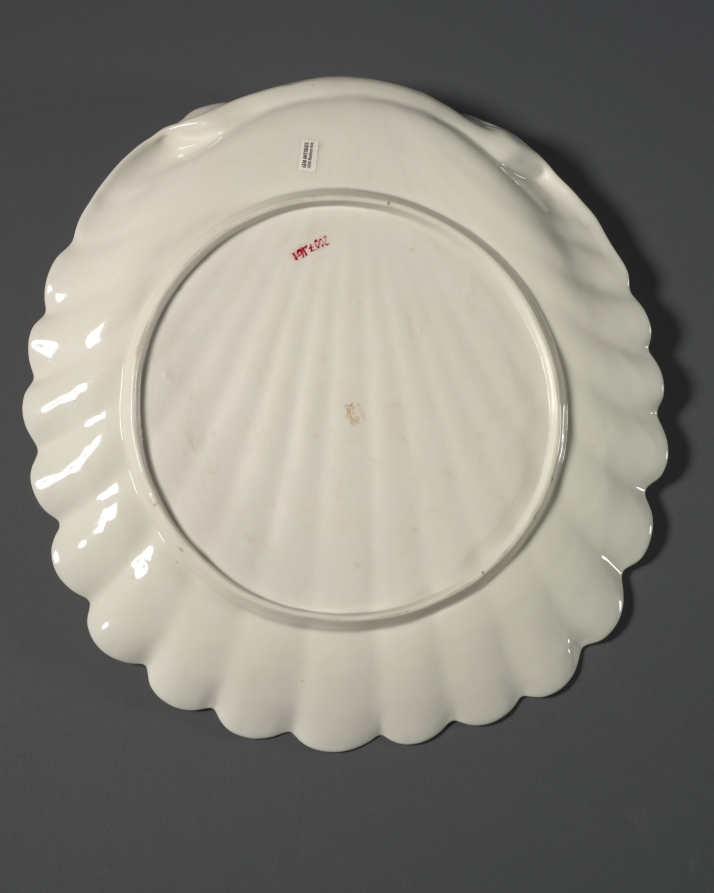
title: Tray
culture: America, New Jersey, Trenton, late 19th century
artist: Ott & Brewer Company (American)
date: 1882–1890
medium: porcelain with gilt decoration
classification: Ceramic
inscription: "Belleek,&" is printed above a horizontal crescent moon with the word "Trenton" in it. Initials "0" and "B" are printed over each tip of the crescent.